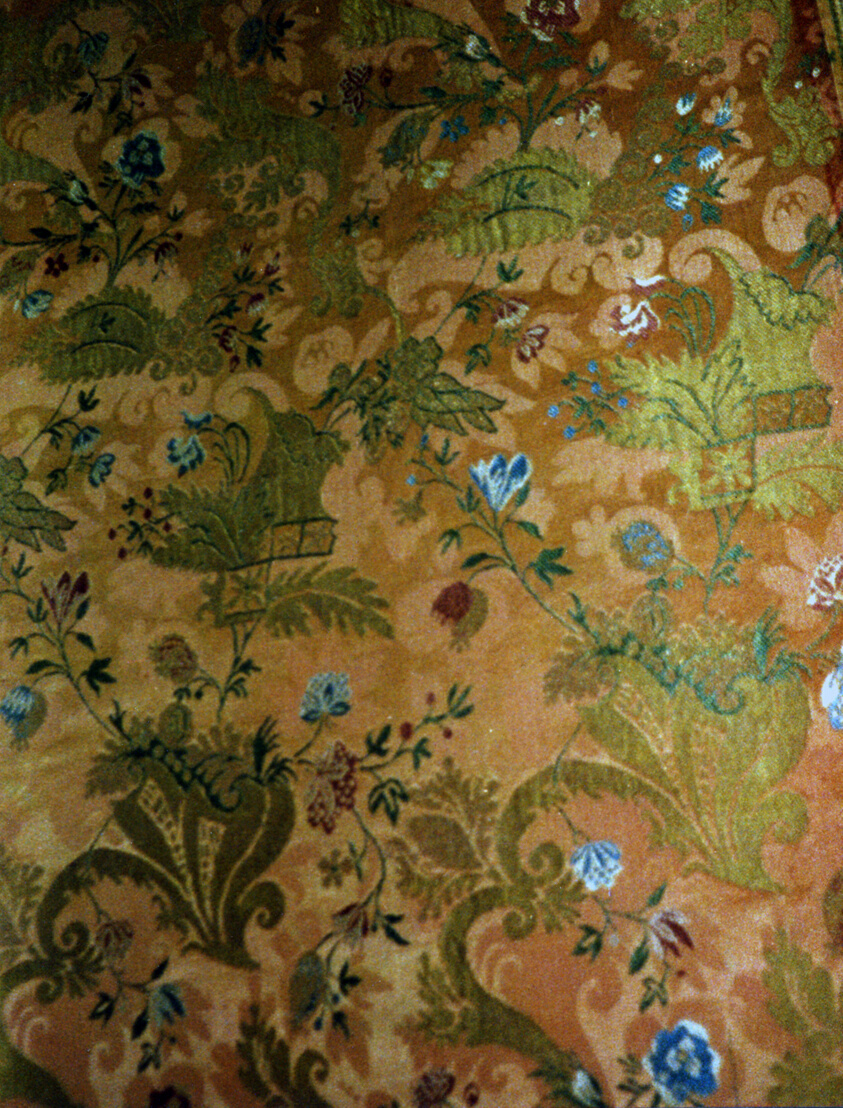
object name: Textile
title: Two Panels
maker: France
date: c. 1711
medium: Silk, gilt-metal-strip-wrapped silk, warp-float faced 7:1 satin weave with supplementary brocading wefts bound in weft-float faced 3:1 twill interlacings and self-patterned by areas of plain weave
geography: France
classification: textile; weaving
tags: flowers